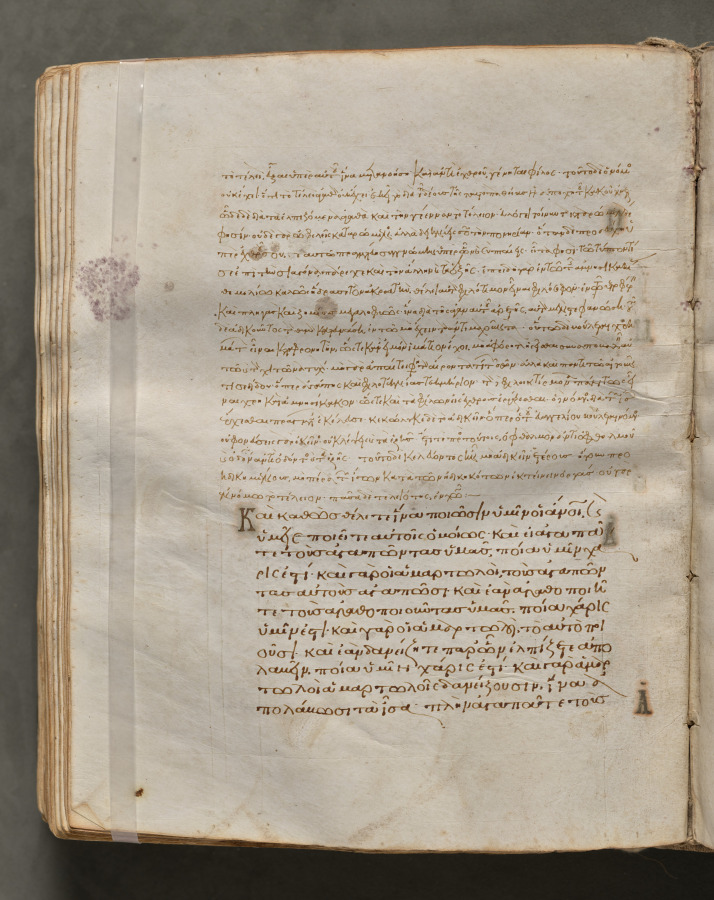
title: Text, folio 229 (verso), from a Gospel Book with Commentaries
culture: Byzantium, Constantinople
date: c. 1000–1100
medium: ink, tempera, and gold on vellum; leather binding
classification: Bound Volume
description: Each of the four gospels in this book opens on a page with brilliantly illuminated borders depicting the author of the text as well as birds-principally peacocks, symbols of the immortality of the soul-and fountains, representing the fountain of life and the salvation of the soul. This volume consists of 428 leaves with texts in Greek. Its level of sophistication suggests that it was probably written and decorated in a monastery in Constantinople.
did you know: Gospel Books were carried in procession through Byzantine churches.